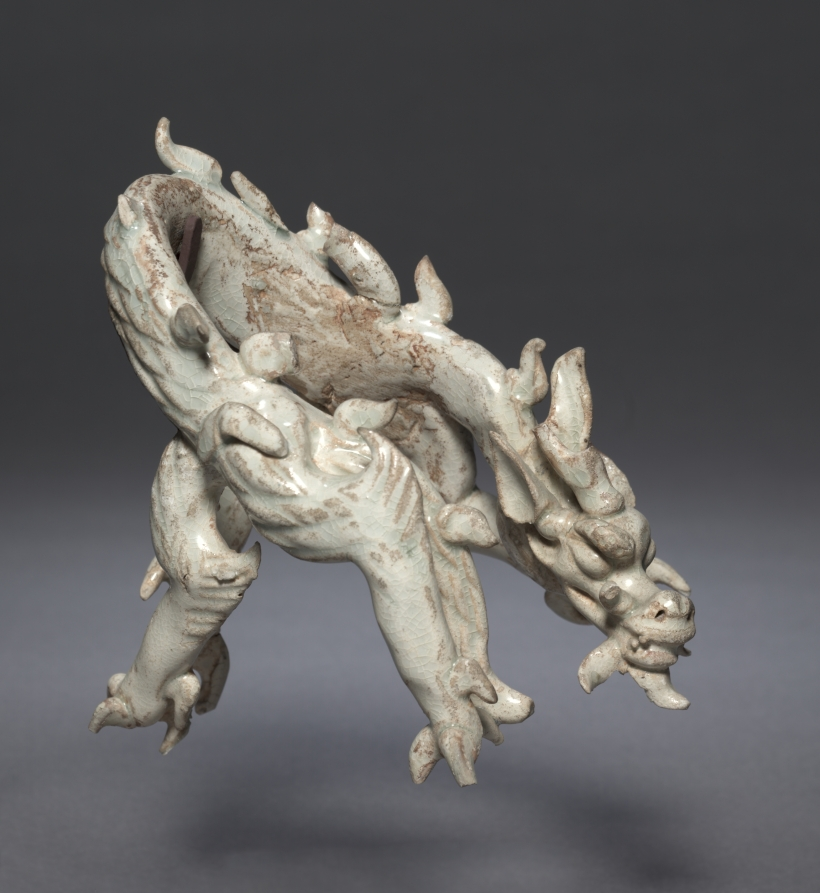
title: Dragon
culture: China, Southern Song Dynasty (1127-1279) - Yuan Dynasty (1271-1368)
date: 1127–1368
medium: glazed porcelain, qingbai ("blue-white") ware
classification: Ceramic